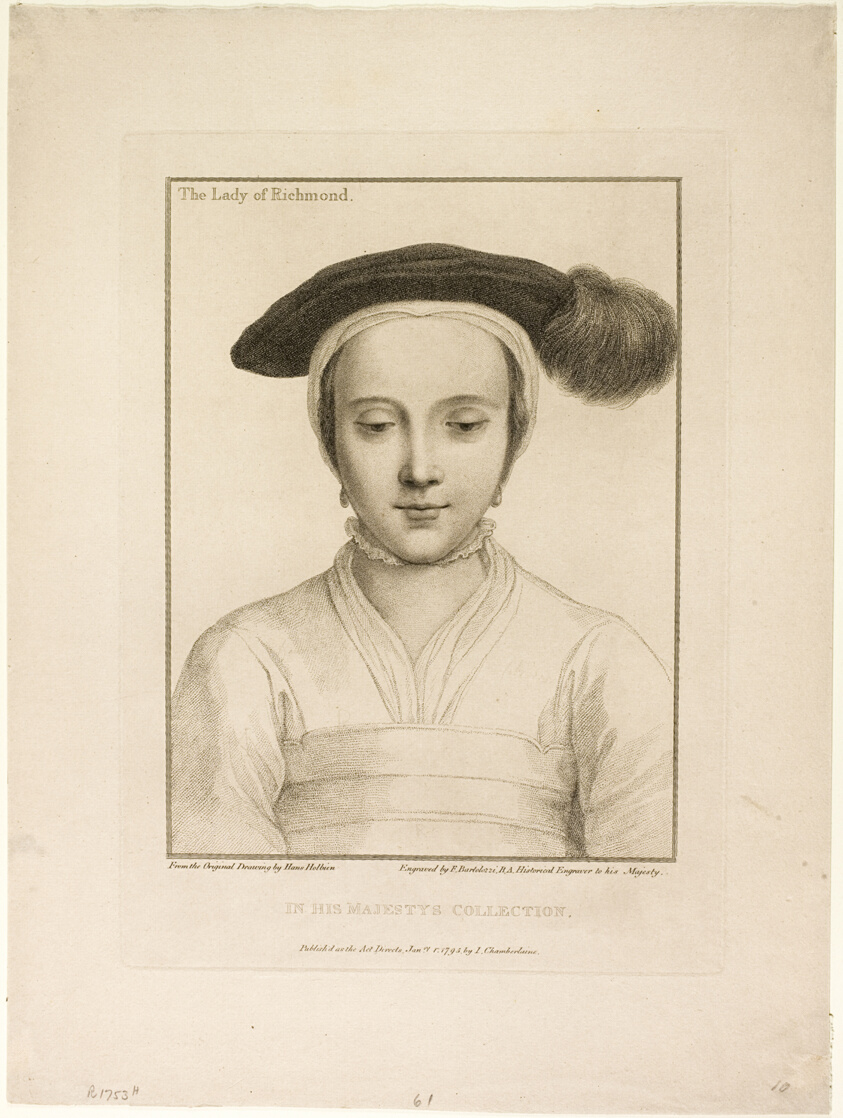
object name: Print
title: The Lady of Richmond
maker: Francesco Bartolozzi (Italian, 1727-1815); after Hans Holbein the younger (German, 1497-1543)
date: January 1, 1795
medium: Stipple engraving on buff wove paper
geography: Italy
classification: engraving; print; prints and drawing